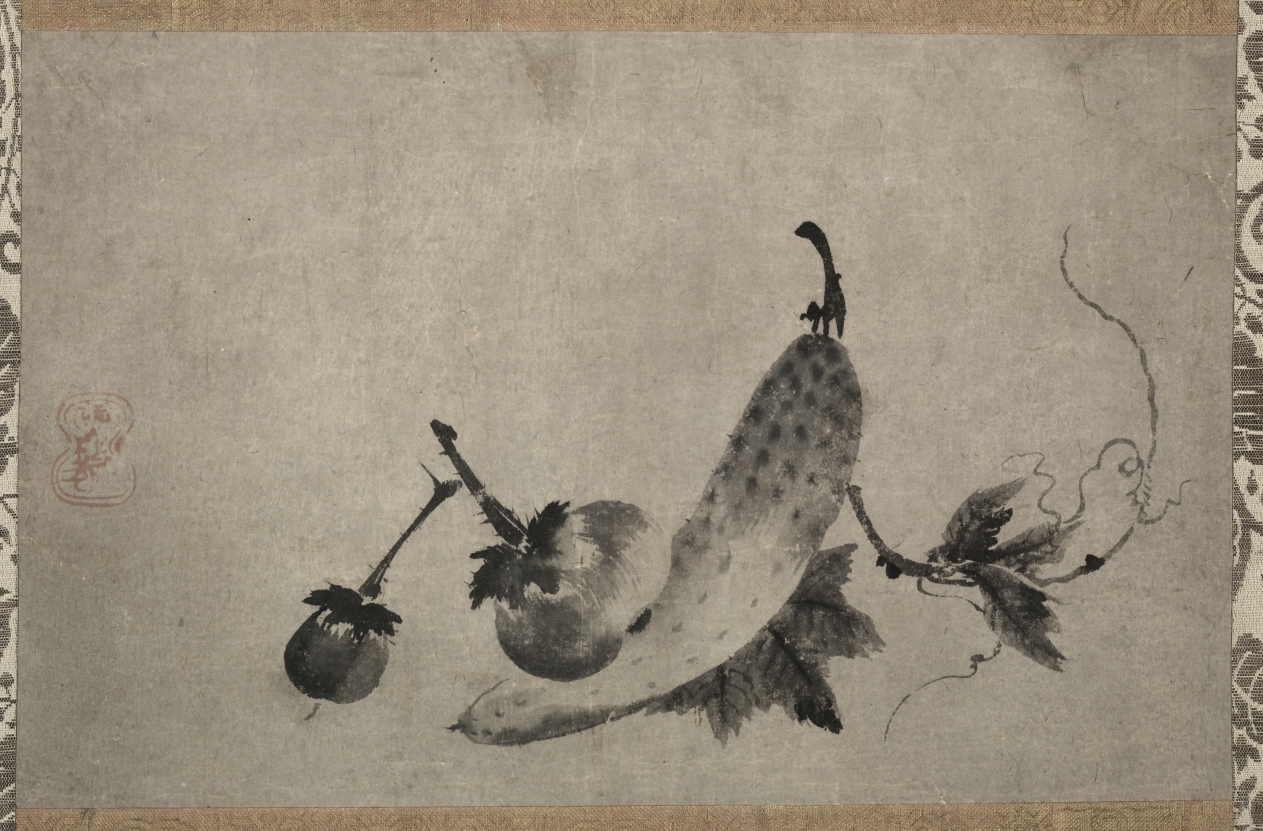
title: Cucumber and Eggplants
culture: Japan, Muromachi period (1392–1573)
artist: Yamada Dōan (Japanese, d. 1571)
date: 1500s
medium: hanging scroll; ink on paper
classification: Painting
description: Still lifes appear frequently in Western painting. This is not the case in East Asian painting traditions. Nevertheless, Zen monastic communities in medieval Japan did like the subject because its outward, "simple" appearance camouflaged the skills required to portray the subject convincingly.